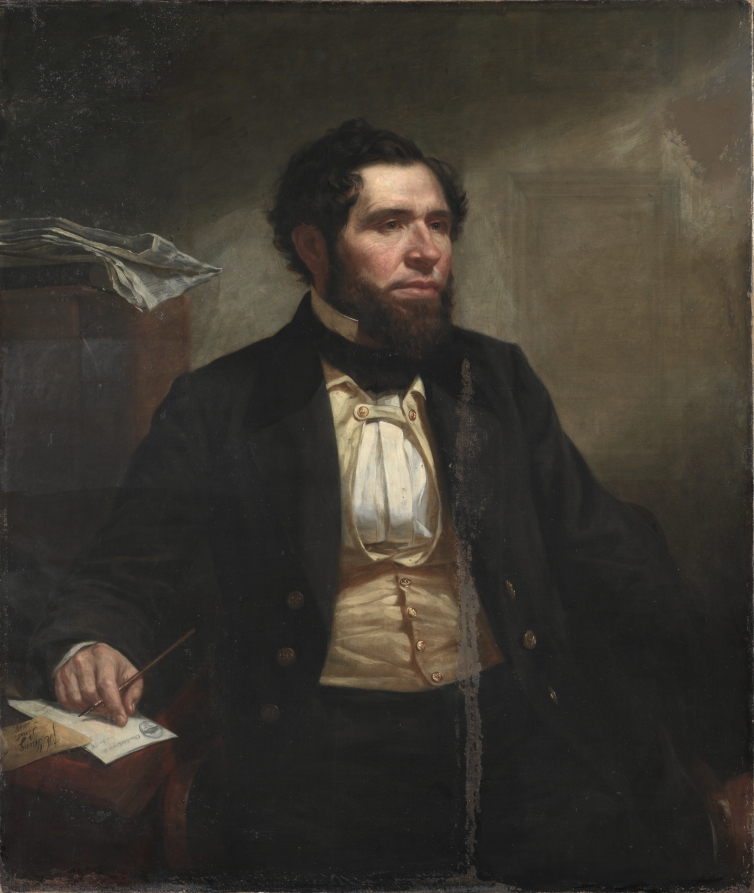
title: Frederic W. Lincoln, Jr.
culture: America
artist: James Harvey Young (American, 1830–1918)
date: 1889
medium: oil on canvas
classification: Painting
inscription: Signed lower left: "J. H. Young / Pinxt. / 1889"